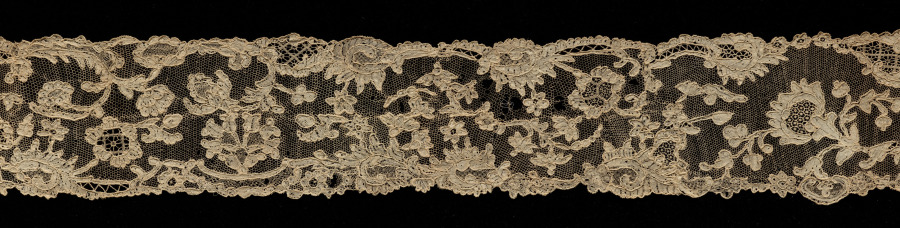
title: Lace Edging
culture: France, Alençon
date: 1715–74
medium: Linen: needle lace (Point d'Alençon)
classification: Lace